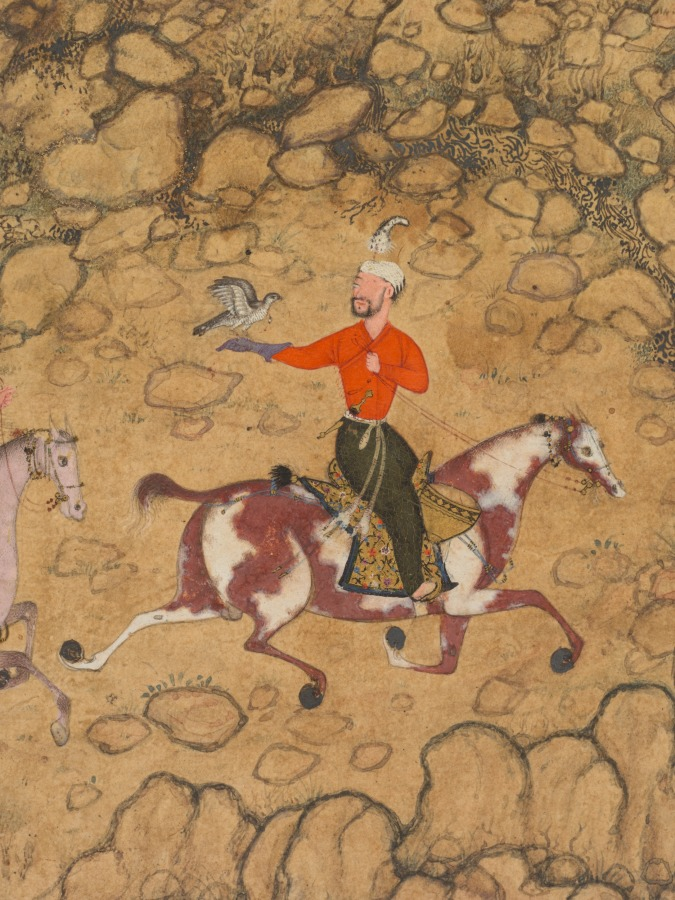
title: Hunting with falcons in a landscape (recto)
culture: Mughal India, court of Akbar (reigned 1556–1605)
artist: attributed to Abd al-Samad (Persian, c. 1510–1600)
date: c. 1558–60; borders added probably 1700s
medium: Gum tempera, ink, and gold on paper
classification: Painting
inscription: Inscription in upper right in nasta‘liq script, probably during the 1700s: the work of Mir Sayyid Ali, the illustrator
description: Mughal princes hunted on horseback with falcons. The hunting party would ride out into the wild and flush the prey from the brush. Then, its hood removed, the falcon would chase the prey and bring it down. This important work is thought to have been painted by one of the Persian artists Akbar’s father brought to India from Iran shortly after his arrival in India. The delicacy of the diminutive figures and the gently modeled rocks of the arid landscape contrast to the boldly dynamic paintings made by Indian artists.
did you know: The hunter’s glove is on the ground, as he pulls his falcon off the duck.